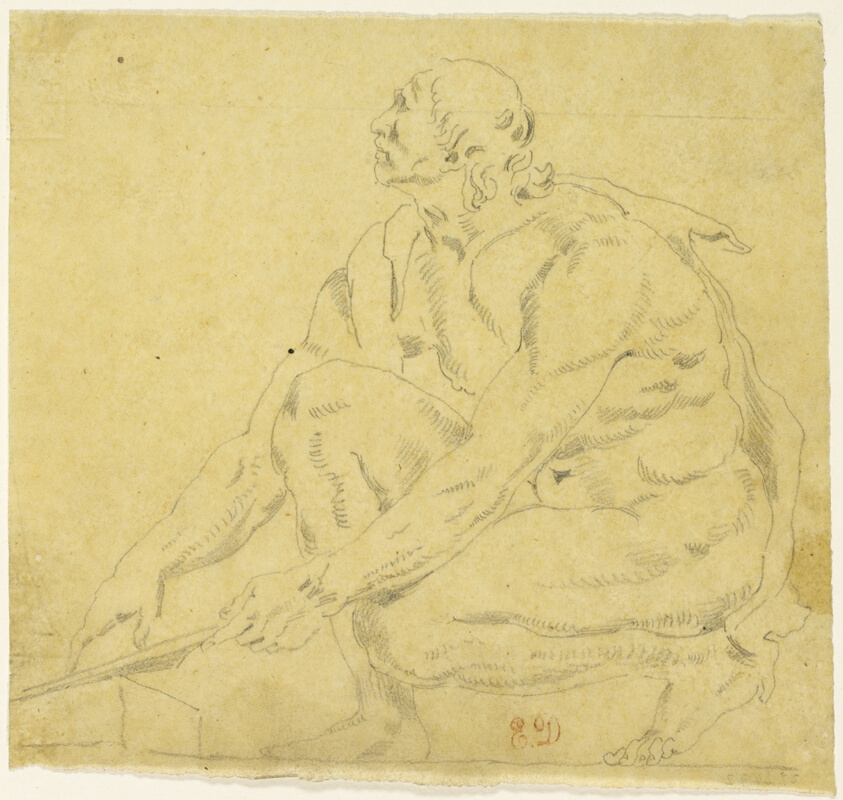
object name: Drawing and Watercolor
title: Copy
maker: Eugène Delacroix (French, 1798-1863)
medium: Graphite on tan tracing paper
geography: France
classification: graphite; drawings (visual works); prints and drawing